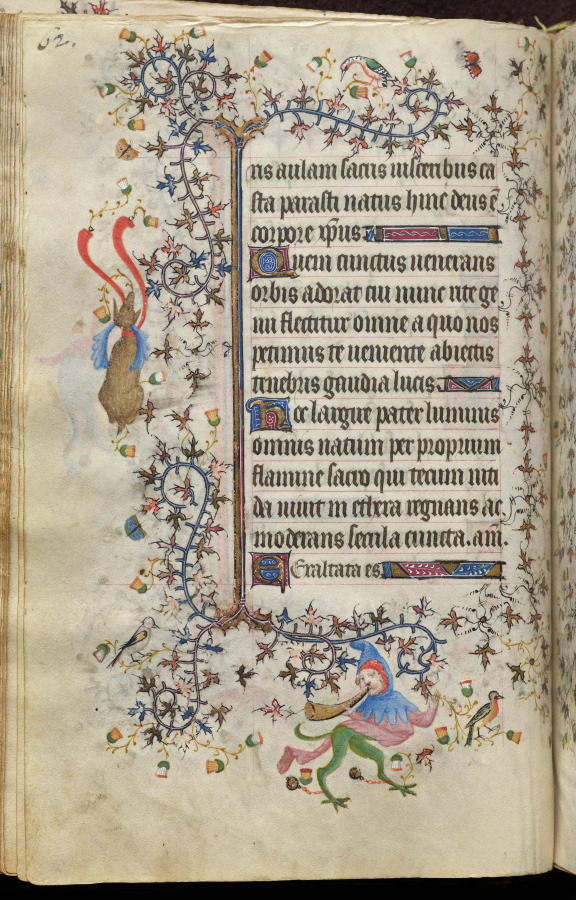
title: Hours of Charles the Noble, King of Navarre (1361-1425): fol. 31v, Text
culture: France, Paris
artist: Master of the Brussels Initials and Associates (French)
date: c. 1405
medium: ink, tempera, and gold on vellum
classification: Bound Volume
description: This precious volume was obviously highly prized by its owner, the French-born King of Navarre, who had his coat of arms painted on no less than twenty folios. Rather than directly commissioning this manuscript from a specific workshop, it seems that Charles the Noble acquired his book of hours -- perhaps ready-made for the luxury market -- while on a trip to Paris in 1404-05. A collaborative effort, six painting styles are evidenced within the pages of this codex, those of two Italians, two Frenchmen, and two Netherlanders. The painter who was responsible for the planning and decoration of the book, and who produced seventeen of the large miniatures, was a Bolognese artist known as the Master of the Brussels Initials. His principal assistant, responsible for most of the borders, was a Florentine who signed his name "Zecho" da Firenze on folio 208 verso.